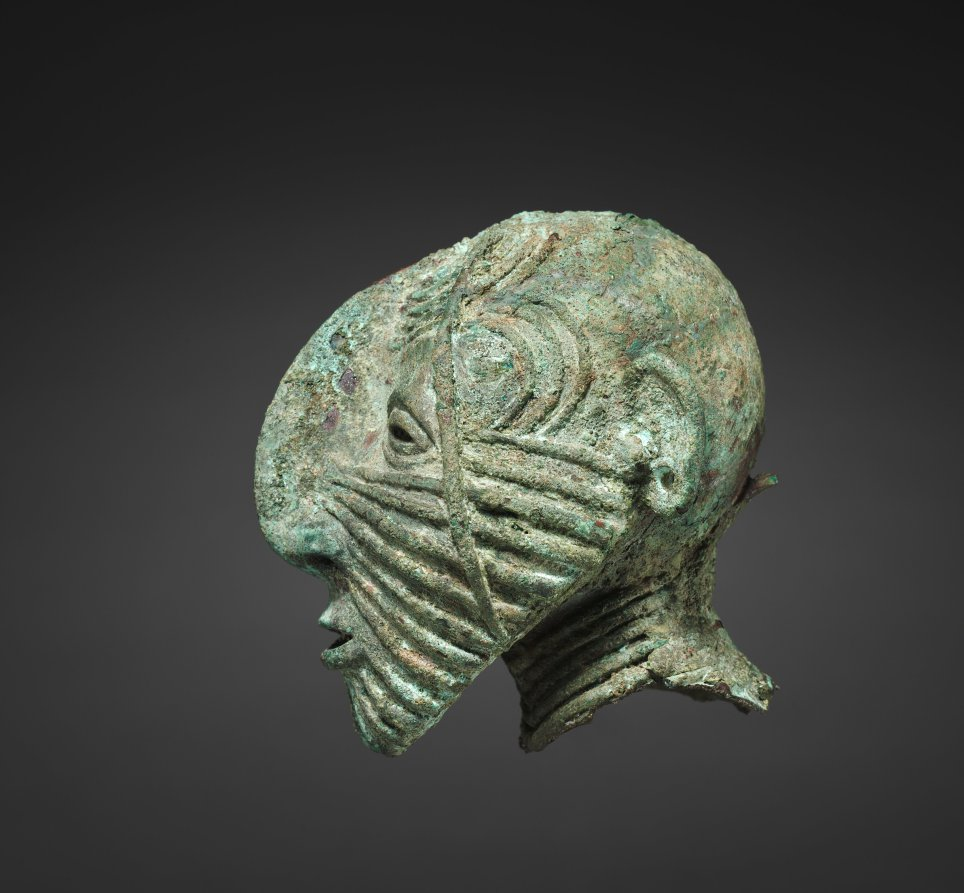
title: Male Head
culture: South East Asia, Thailand, Ban Chiang, Neolithic period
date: c. 1000 BCE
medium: bronze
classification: Sculpture